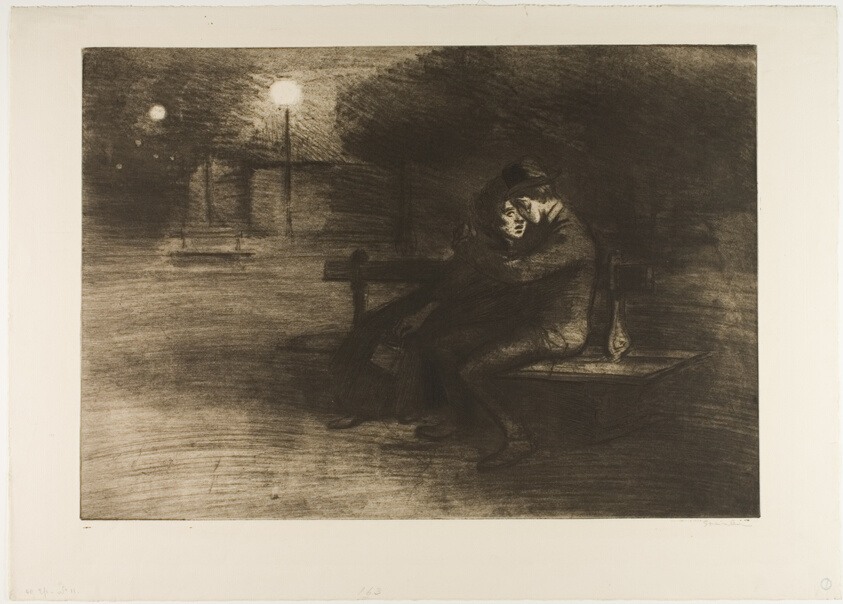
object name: Print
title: Lovers on a Bench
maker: Théophile-Alexandre Steinlen; French, born Switzerland, 1859-1923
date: 1902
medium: Soft ground etching, aquatint and etching in warm black on ivory laid paper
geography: France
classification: etching; print; prints and drawing